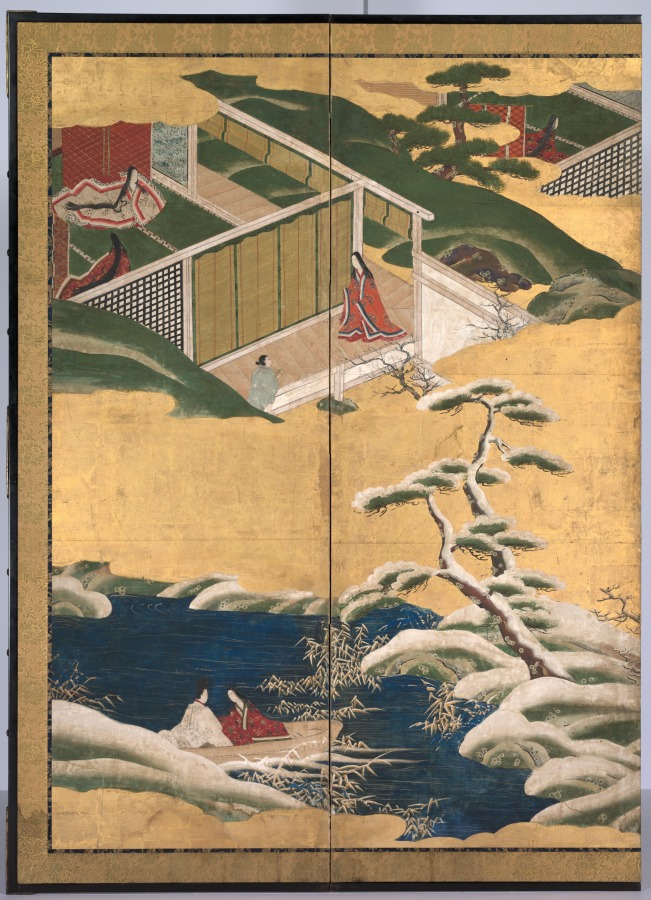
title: Scenes from the Tale of Genji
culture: Japan, Edo period (1615–1868)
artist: Tosa School (Japanese)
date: late 1700s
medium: One of a pair of six-panel folding screens; ink, color, and gold on gilded paper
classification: Painting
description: Folding screens served as temporary dividers in traditional Japanese open-plan architectural spaces. This pair was inspired by Japan’s most celebrated work of literature, the Tale of Genji, written by Murasaki Shikibu, an attendant to the empress in the early 11th-century imperial court. The novel follows the love life of the “Shining Prince” Genji and delves into the psychological states of his many companions. Distinct episodes are nestled within a matrix of golden clouds and landscape elements. Each screen includes six episodes presented in a nonlinear fashion, capturing scattered highlights of the story.